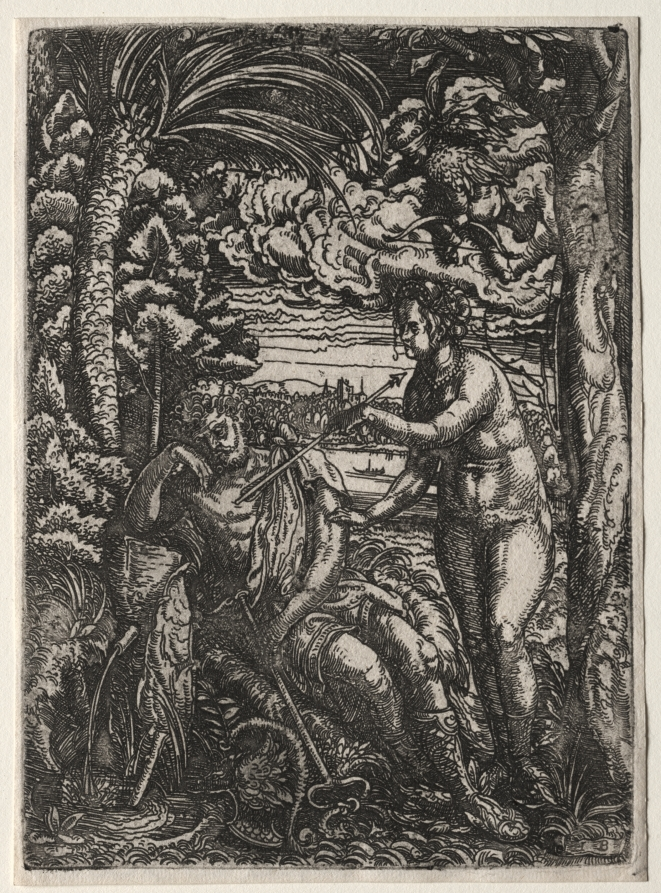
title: Venus and Mercury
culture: Germany, late 15th-early 16th century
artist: Hans Burgkmair (German, 1473–1531)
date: c. 1520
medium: etching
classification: Print